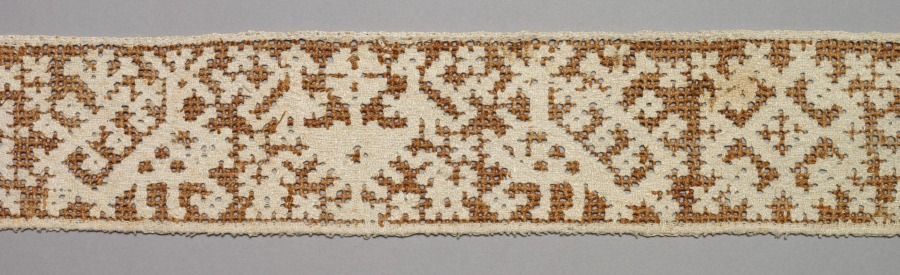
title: Lace Band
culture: Italy, Sicily, 1500s-1600s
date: 1500s-1600s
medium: Linen: needle lace (drawnwork)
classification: Lace